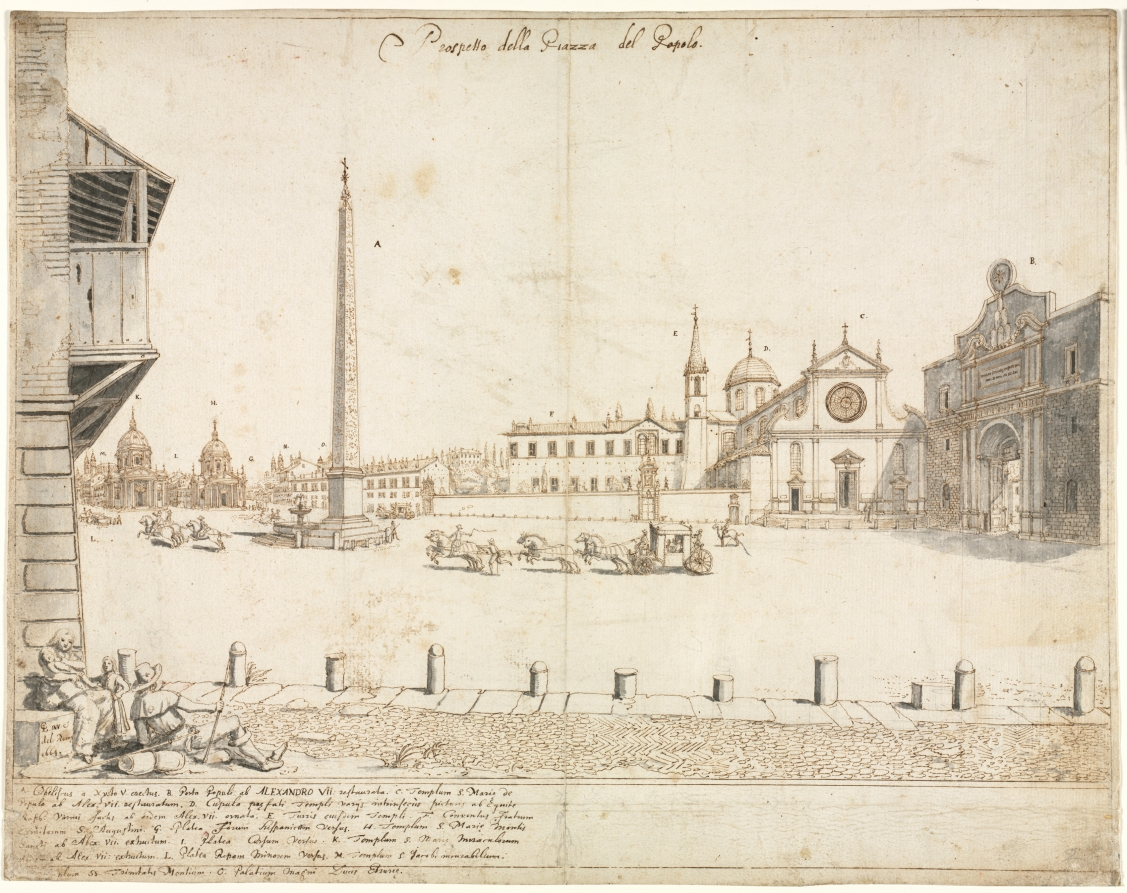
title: Eighteen Views of Rome: The Piazza del Popolo (recto)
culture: Flanders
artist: Lievin Cruyl (Flemish, c. 1640-c. 1720)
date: 1664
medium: pen and brown ink and brush and gray wash over stylus and graphite; framing lines in brown ink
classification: Drawing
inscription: signed, lower left, in brown ink: [artist monogram: CL]. INV. et / del: Romæ / 1664. ; by artist, upper center, in brown ink: Prospetto della Piazza del Popolo. ; by artist, throughout composition, in brown ink: [the letters A-O] ; by artist, lower left, in brown ink: A. Obeliscus a Xysto V. erectus. B. Porta Populi ab ALEXANDRO VÎÎ: restaurata. C. Templum S. Maria de / Populo ab Alex. vii. restauratum. D. Cupula praefati Templi varijs intrinsecùs picturis ab Equite / Raph: Vanni factis ab eodem Alex. vii. ornata. E.Turris eiusdem Templi. F. Conventus Fratrum / Eremitarum S. Augustini. G. Platea Forum hispanicum Versus. H. Templum S. Mariæ Montis / Sancti ab Alex: vii. extructum. I. Platea Cursum Versus. K. Templum S. Mariæ Miraculorum / [illegible]dem ab Alex. vii: extructum. L. Platea Ripam Minorem Versus. M. Templum S. Jacobi incurabilium. / [N. Tem]plum SS. Trinitatis Montium. O. Palatium Magni Ducis Etruriæ. ; lower center, in graphite: L[illegible] ; lower right, in graphite: 2